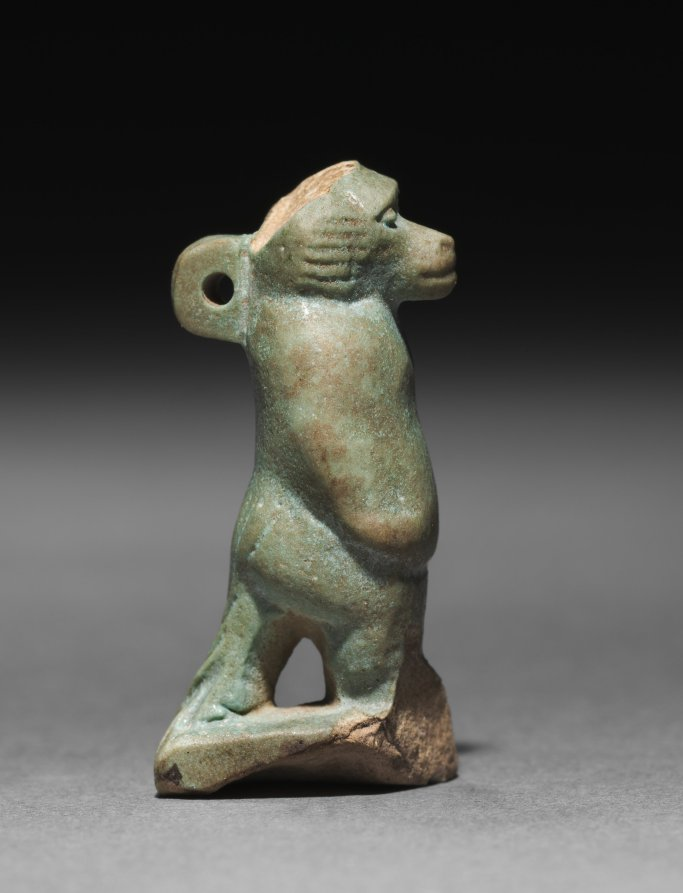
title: Baboon-Falcon Hybrid Amulet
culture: Egypt, Late period (715–332 BCE)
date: 715–332 BCE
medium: pale robin's egg blue faience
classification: Amulets